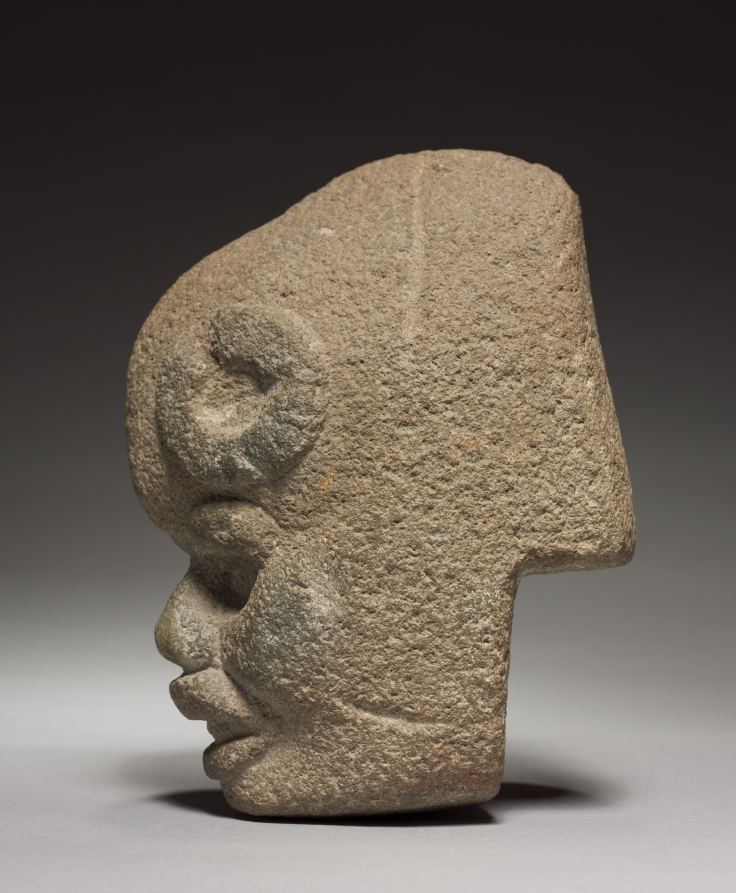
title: Head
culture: Mexico, Classic Veracruz (Totonac or Tajin)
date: 600–1100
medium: stone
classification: Sculpture